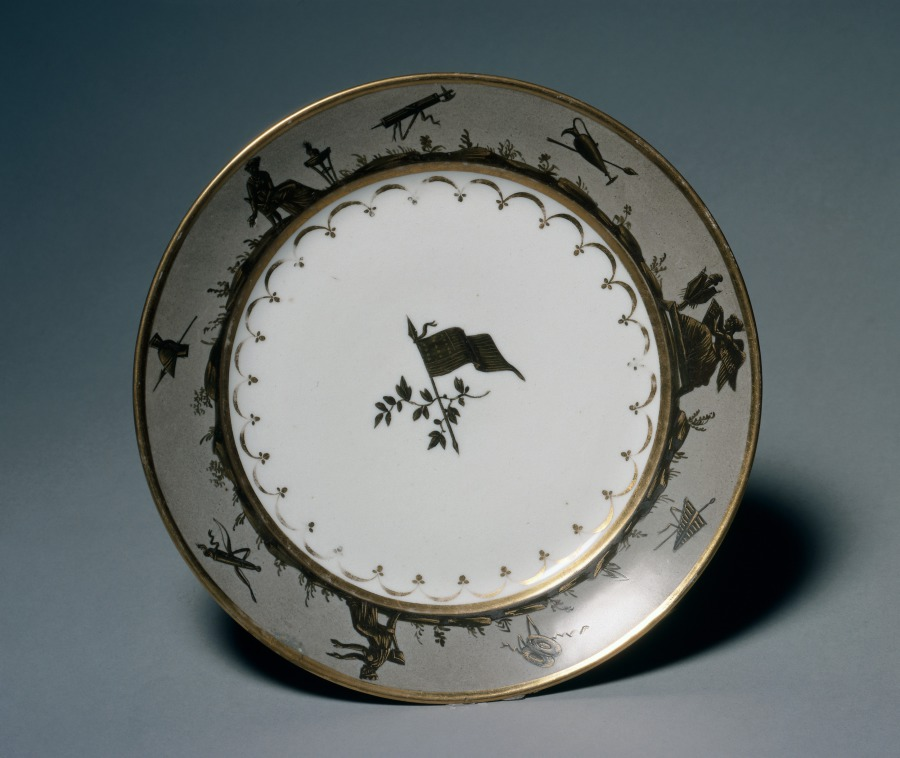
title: Dinner Plate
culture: France, Paris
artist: probably by Guérhard et Dihl (French)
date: c.1805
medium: porcelain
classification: Ceramic